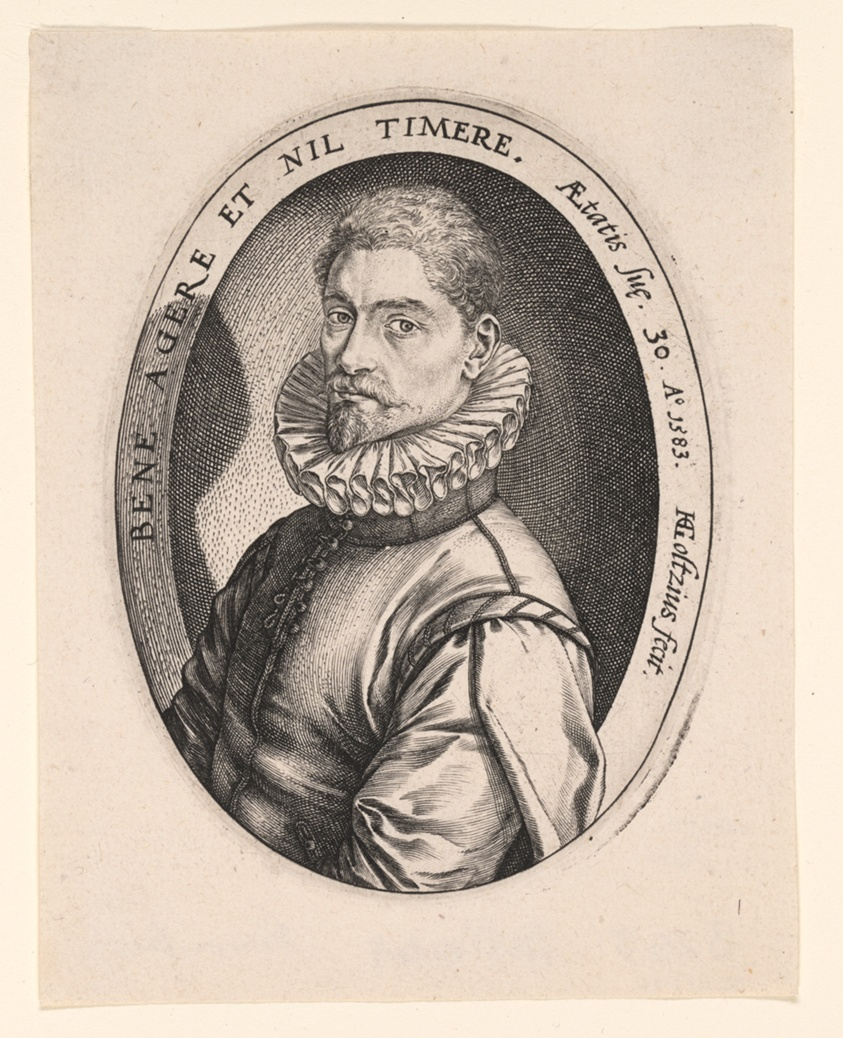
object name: Print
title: Hieronymous Scholiers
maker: Hendrick Goltzius (Dutch, 1558–1617)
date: 1583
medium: Engraving on paper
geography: Netherlands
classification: engraving; paper; print; prints and drawing